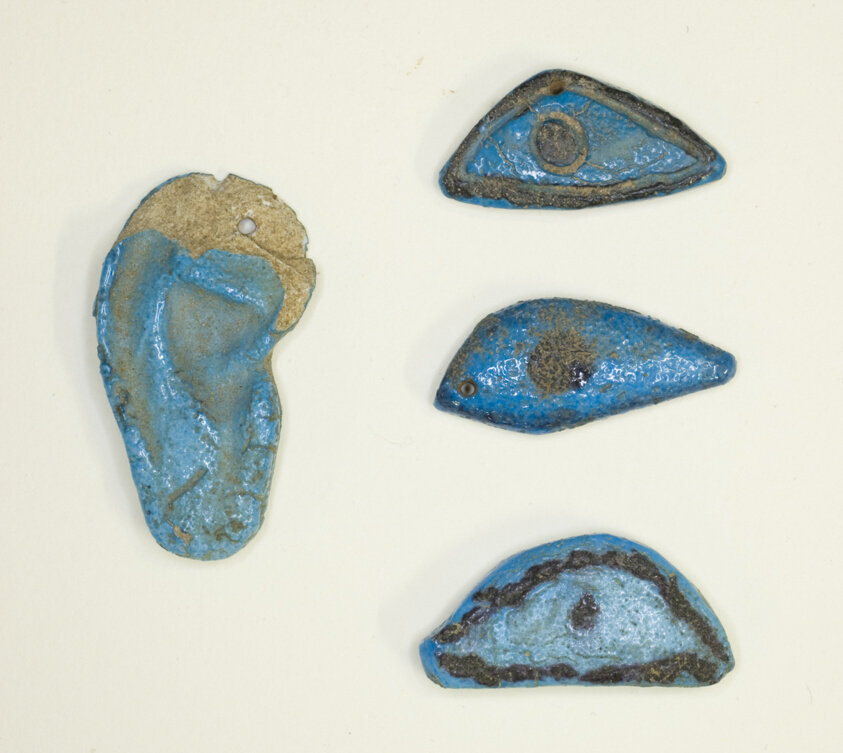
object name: Costume and Accessories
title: Amulets (Ear and 3 Eyes)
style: eighteenth dynasty, new kingdom, egyptian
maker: Egyptian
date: New Kingdom (about 1550–1069 BCE)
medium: Faience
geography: Egypt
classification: ceramics; jewelry; amulet; ancient art; costume; faïence (composite material)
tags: eyes